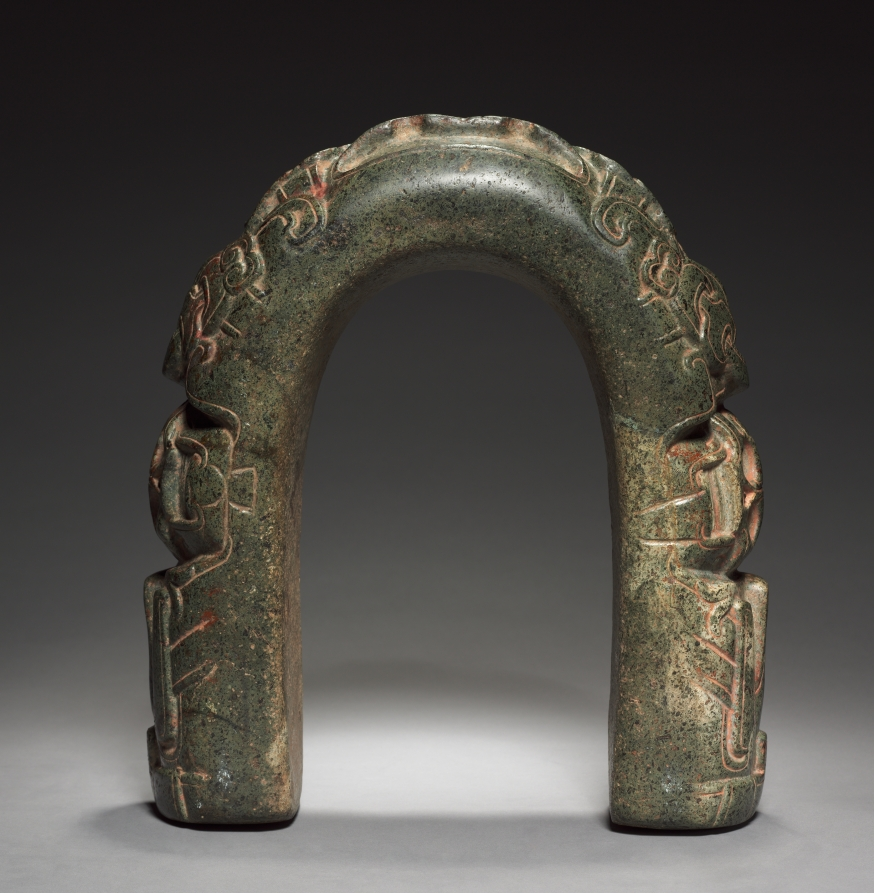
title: Ballgame Hip Protector (Yoke)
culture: Mexico, Gulf Coast, Classic Veracruz style (600-1100)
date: 600–900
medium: greenstone, pigment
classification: Sculpture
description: U-shaped ballgame sculptures imitate the shape of belt-like protectors, perhaps made of wood and padding, worn to shield ballplayers from injury when they returned the solid rubber ball from their hips. This fine example embodies a major theme of the ballgame: the connection between fertility and death. It is made of greenstone, a precious material that through its color symbolizes the lush burgeoning of nature after the rainy season. The imagery, however, is menacing: a monstrous head snarls from the curve, and human skulls appear on the sides.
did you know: The ballgame was a team sport played on specially constructed rectangular courts and involved striking a large solid rubber ball without using your hands.